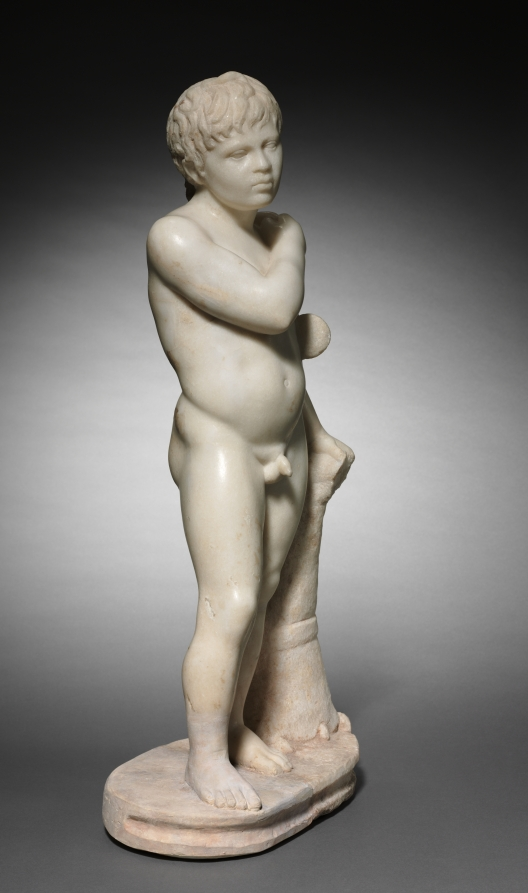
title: Youth with Jumping Weights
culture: Italy, Rome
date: c. 40–70 CE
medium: marble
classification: Sculpture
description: The hourglass-shaped jumping weights slung over his shoulder, together with the animal-skin punching bag on which he leans, characterize this youth as an athlete. The distinctive haircut, short with one long tress in back, may indicate a childhood vow, perhaps to be trimmed in a future ceremony. Several very similar sculptures exist in other collections, suggesting the existence of a single prototype, now lost.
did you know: The lower right leg and foot of this sculpture do not survive, and have been reconstructed.